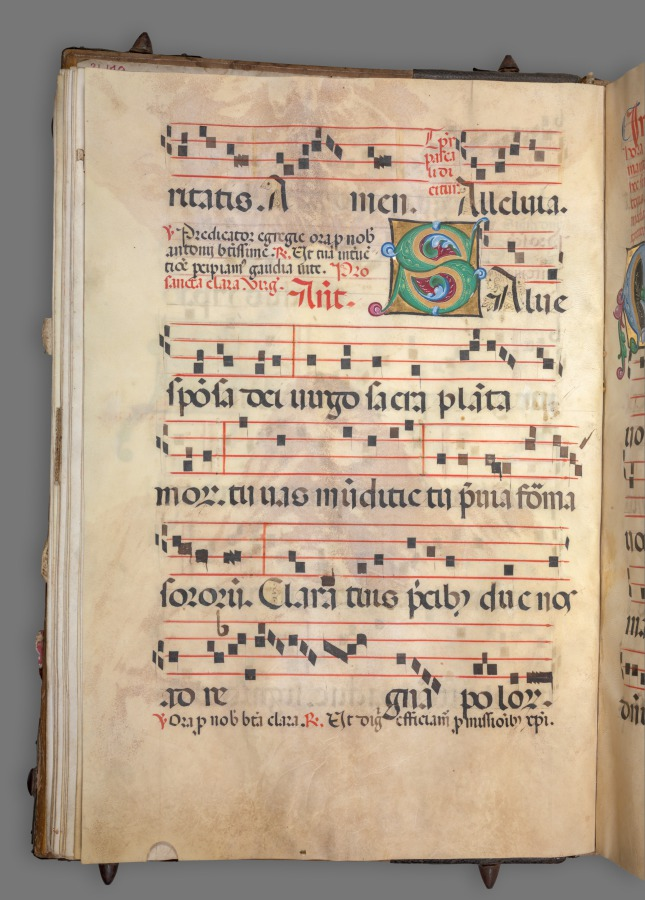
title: Gradual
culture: Italy, Verona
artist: circle of Girolamo dai Libri (Italian, 1474–1555)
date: c. 1520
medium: Ink, tempera, and gold on vellum; wood binding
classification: Manuscript